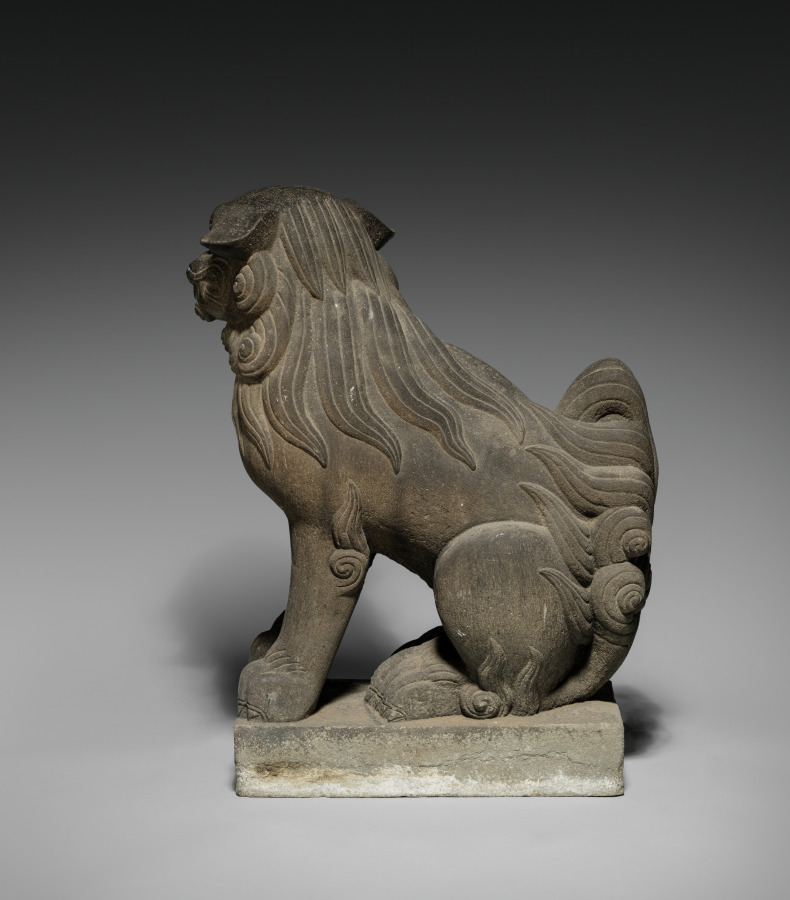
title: Lion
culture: Japan?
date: c. 1800s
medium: gray schist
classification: Sculpture